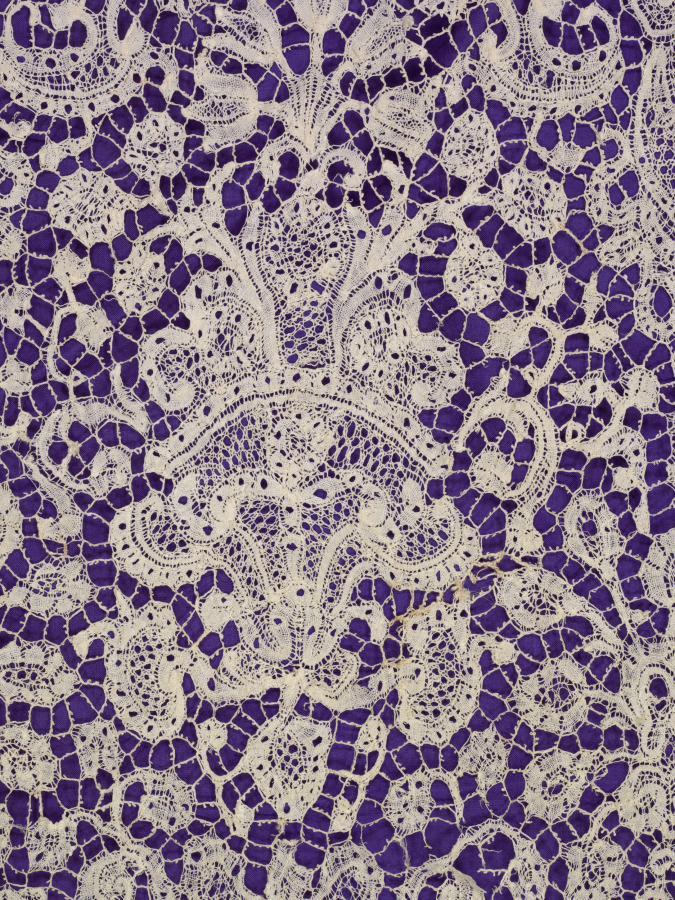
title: Alb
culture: Spain: embroidered linen; Flanders: bobbin lace (Point d’Angleterre) flounce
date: Embroidered Linen: 1600s; Bobbin Lace (Point d’Angleterre) Flounce: 1700s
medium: Plain weave linen embroidered in gold and silver; linen bobbin lace (Point d’Angleterre a Reseau)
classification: Garment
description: This beautiful vestment, called an alb, was worn under other liturgical garments by the clergy who served at the altar. Embroidered with gilt-metal thread flora on a linen ground, it is trimmed with a flounce and cuffs of lace, the most fashionable and expensive material at the time. Its purple silk lining indicates that it belonged to an archbishop. The exquisitely worked bobbin lace consists of two large composite floral designs flanked by popular curved forms on an elaborate bar ground that repeats ten times around the flounce.